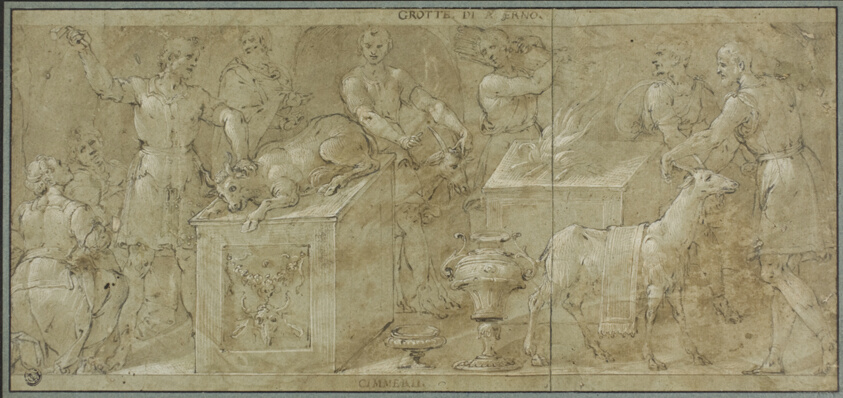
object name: Drawing and Watercolor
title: Aeneas and His Companions Preparing Animals for Sacrifice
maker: Avanzino Nucci (Italian, 1551-1629)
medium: Pen and brown ink with brush and brown wash, heightened with white gouache, over traces of black chalk, on blue brown paper, pieced and laid down on cream wove paper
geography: Italy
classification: ink with wash; drawings (visual works); prints and drawing